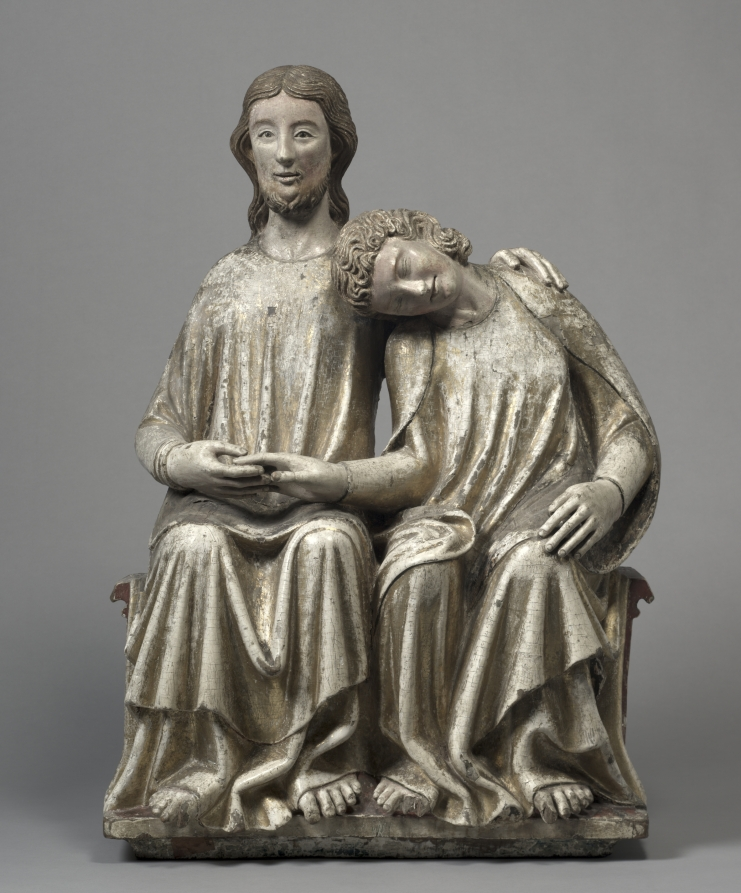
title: Christ and Saint John the Evangelist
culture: Germany, Swabia, near Bodensee (Lake Constance)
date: 1300–1320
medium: polychromed and gilded oak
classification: Sculpture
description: This sculptural group featuring Saint John the Evangelist resting on the shoulder of Christ was a prolific subject in Swabia, the region on the Swiss border. The subject appears to be unique to this region, where it became popular in the years following 1300. Many of these devotional sculptures adorned the chapels of Dominican convents; this is artistically among the finest to survive. It captures the pathos of the moment, based on the Gospel of John (13:23), which states that during the Last Supper one of Christ’s disciples, namely "whom Jesus loved," was resting on his shoulder. As a focus for devotion and contemplation, this sculpture reflects the fundamental religious beliefs rooted in the mysticism that dominated the period. Mysticism was a movement that intended to stimulate the contemplation of Christ’s Passion and suffering. Mysticism encouraged private devotion and religious images, called andachtsbilder (devotional images), appeared in large numbers in late medieval Germany.